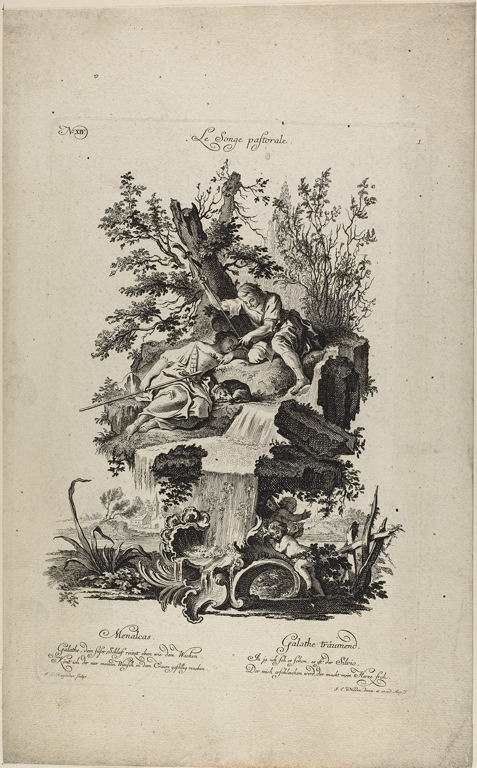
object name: Print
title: Pastoral Dream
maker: Johann Lorenz Rugendas I (German, 1730–1799); after Charles Eisen (French, 1720–1778)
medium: Etching on ivory laid paper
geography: Germany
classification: engraving; print; prints and drawing